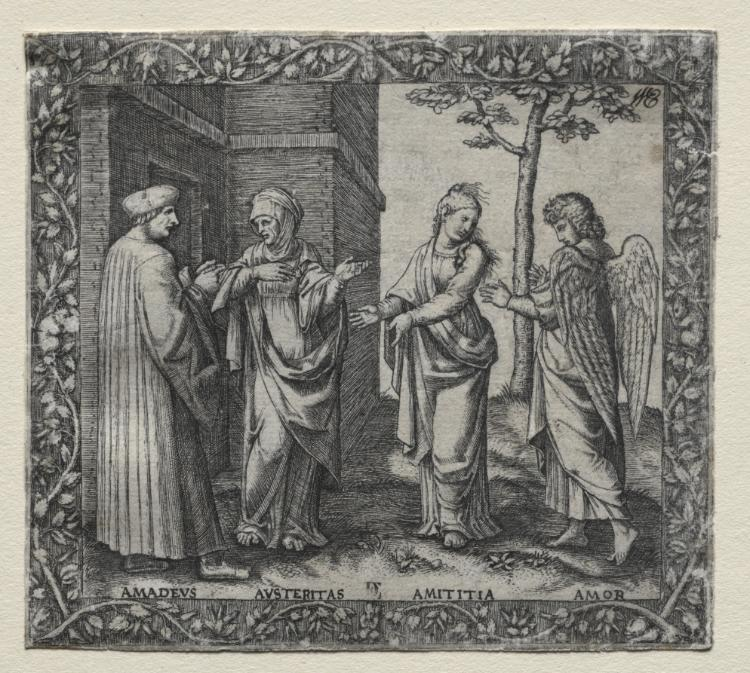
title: Illustration to Amadeo Berruti's Dialogue on Friendship, Rome, 1517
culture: Italy, 16th century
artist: copy after Marcantonio Raimondi (Italian, 1470/82–1527/34)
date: c. 1517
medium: engraving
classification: Print